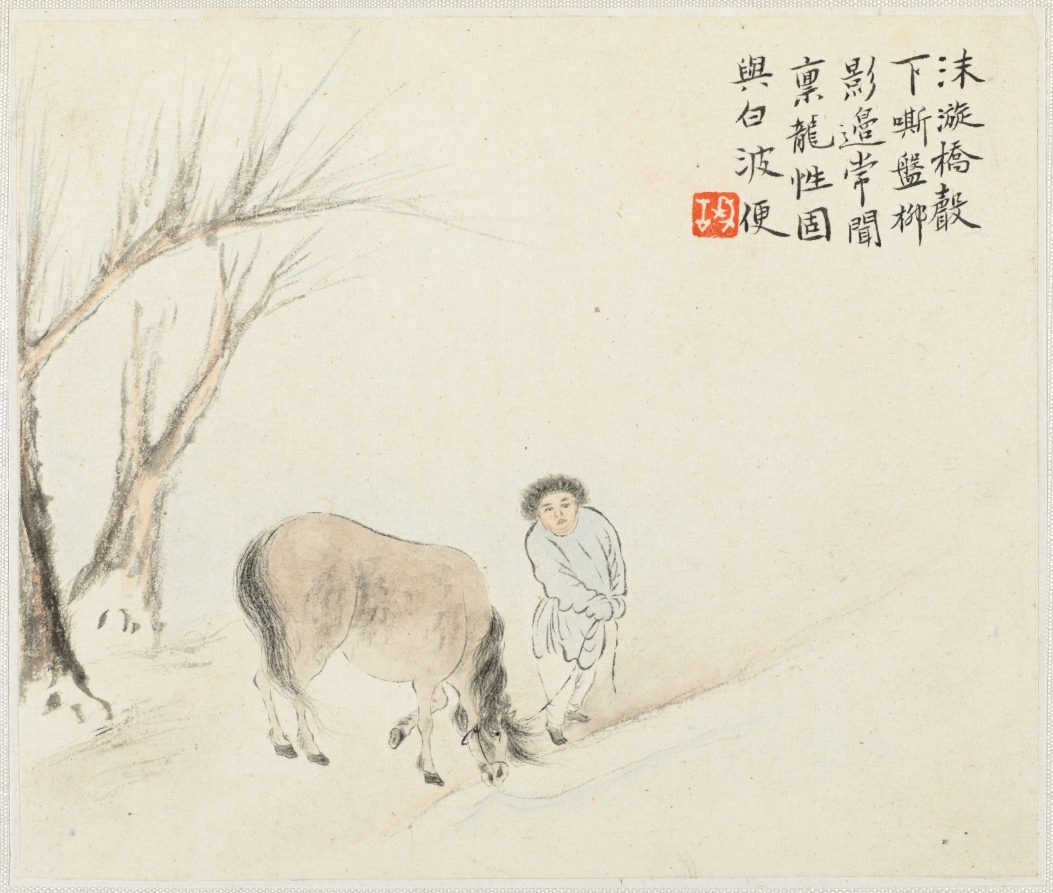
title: Album of Landscape Paintings Illustrating Old Poems: Boy Holding a Horse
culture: China, Qing dynasty (1644-1911)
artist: Hua Yan (Chinese, 1682–c. 1765)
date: 1745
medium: Album leaf; ink and light color on paper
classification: Painting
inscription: Calligraphy and seal upper right corner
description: Hua Yan is one of the Eight Eccentrics of Yangzhou, who rejected orthodox ideas about painting.